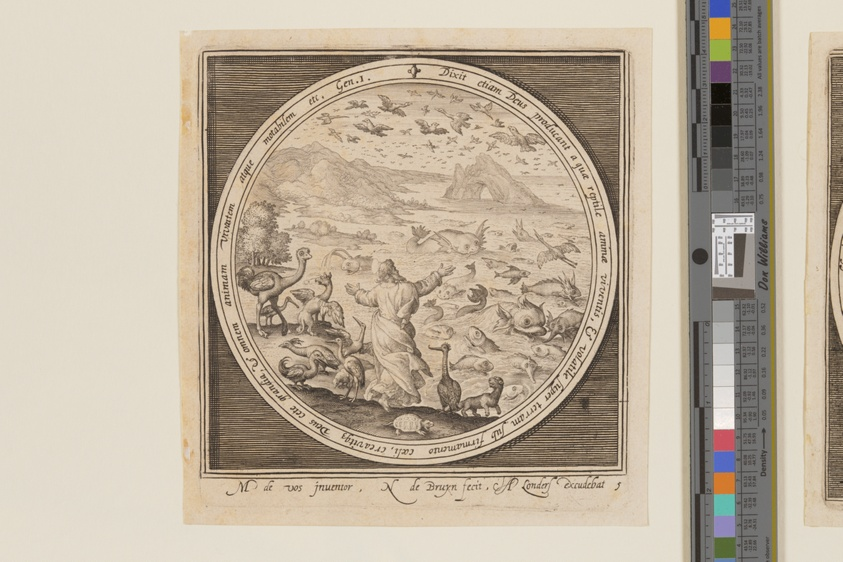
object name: Print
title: Fifth Day: The Creation of Birds and Fish, from The Creation to the Expulsion from Paradise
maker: Nicolaes de Bruyn (Flemish, 1571–1656); after Maarten de Vos (Flemish, 1532–1603)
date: c. 1610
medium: Engraving on ivory laid paper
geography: Flanders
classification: engraving; paper; print; prints and drawing